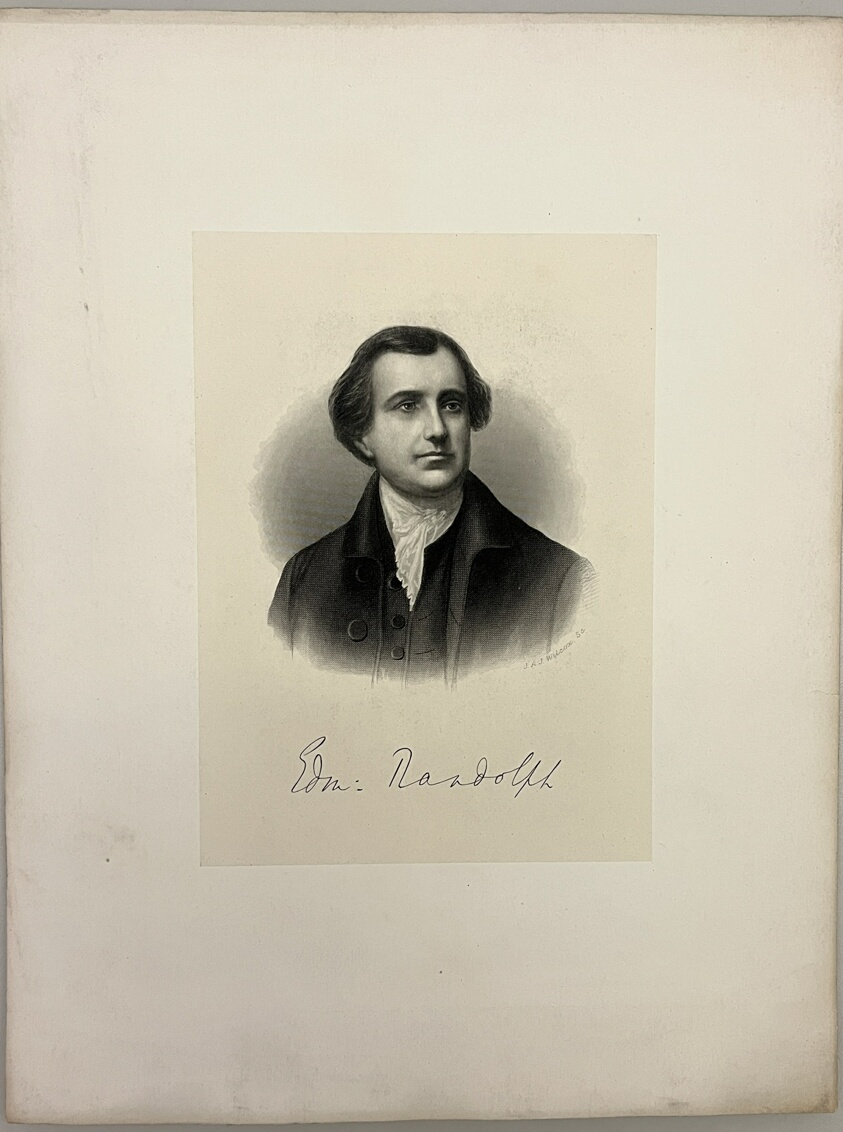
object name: Print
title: Edward Randolph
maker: John Angel James Wilcox (American, born 1835)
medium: Lithography on paper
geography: United States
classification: reproduction; print; prints and drawing